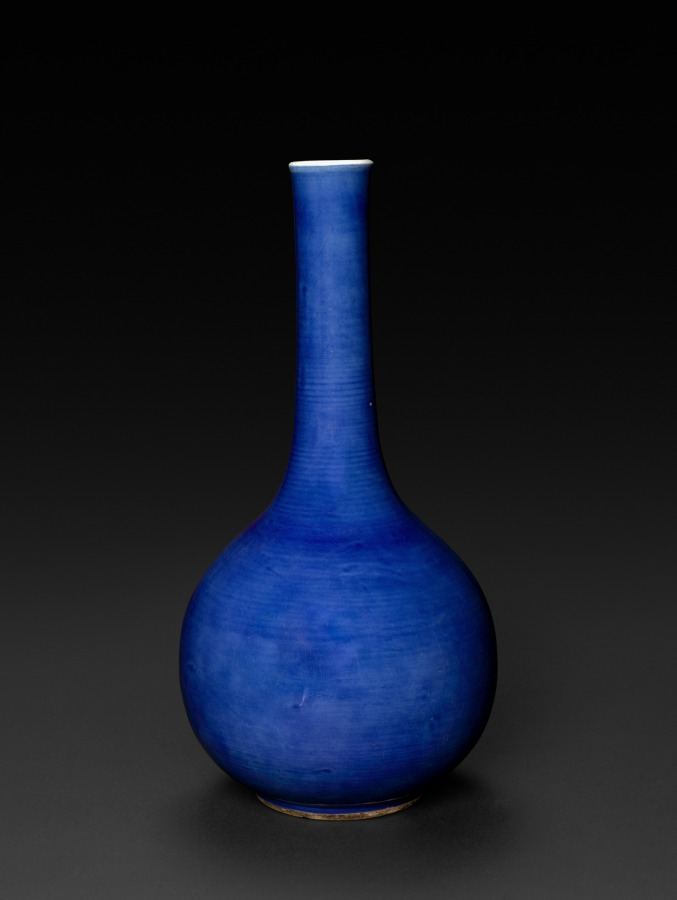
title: Bottle Vase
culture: China, Qing dynasty (1644-1911), Kangxi reign (1662-1722)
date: 1662–1722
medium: porcelain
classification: Ceramic